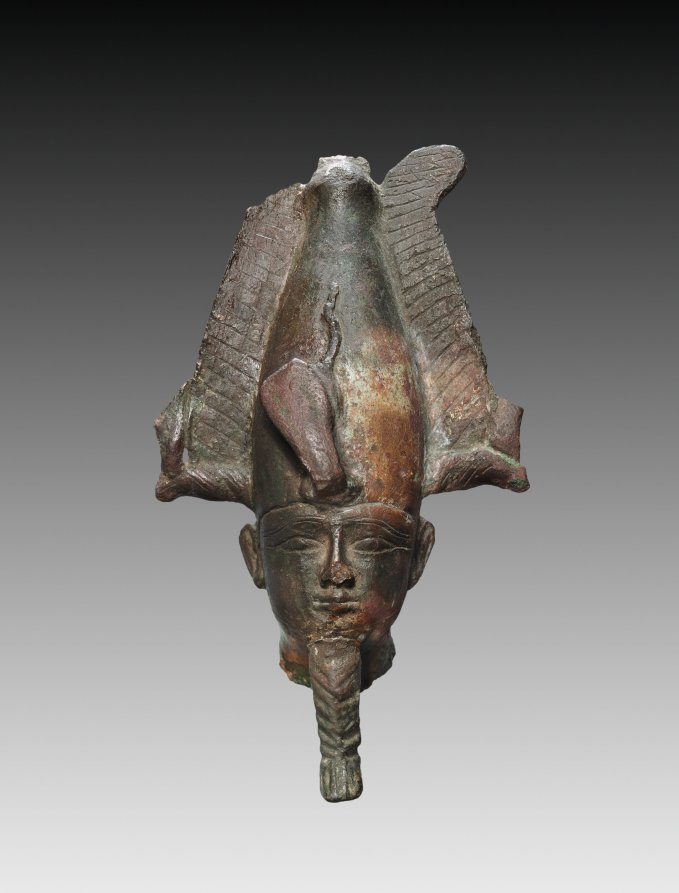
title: Head of Osiris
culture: Egypt, Late period (715–332 BCE), Dynasty 26 or later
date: 664–525 BCE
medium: bronze, hollow cast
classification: Sculpture